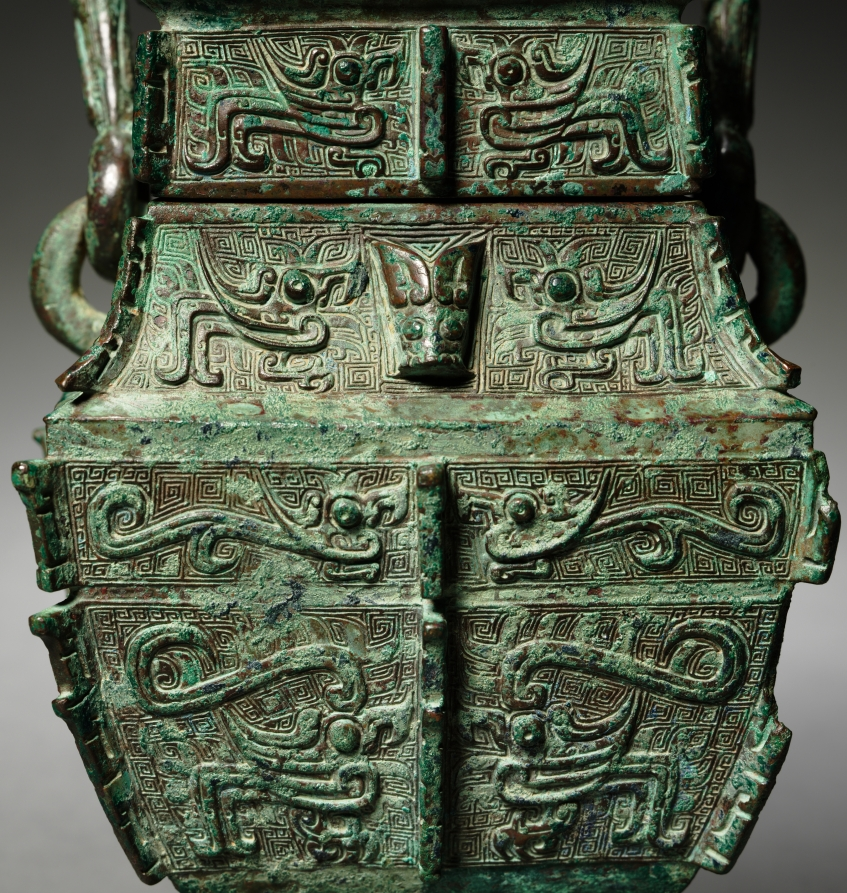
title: Square Wine Container (Fangyou)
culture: China, Henan province, probably Anyang, Shang dynasty (c. 1600–c. 1046 BCE), Anyang phase (c. 1250–1046 BCE)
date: c. 1250–1046 BCE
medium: bronze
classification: Metalwork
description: From the finely proportioned body to the elaborate decoration cast with great precision, this ritual wine vessel displays the artistic refinement and technical virtuosity that marked the full blossoming of late Shang bronze art. The dramatic contrast of the crested birds (kuifeng) against the dense background of spiral patterns (leiwen) gives the vessel a new force, clarity, and intense vitality. The distinctive square body also places it as a rare and important type among the more usual round or ovoid types.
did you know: The bird motif decoration of this bronze is uncommon; more often these bronzes are decorated with a combination of birds and dragons.